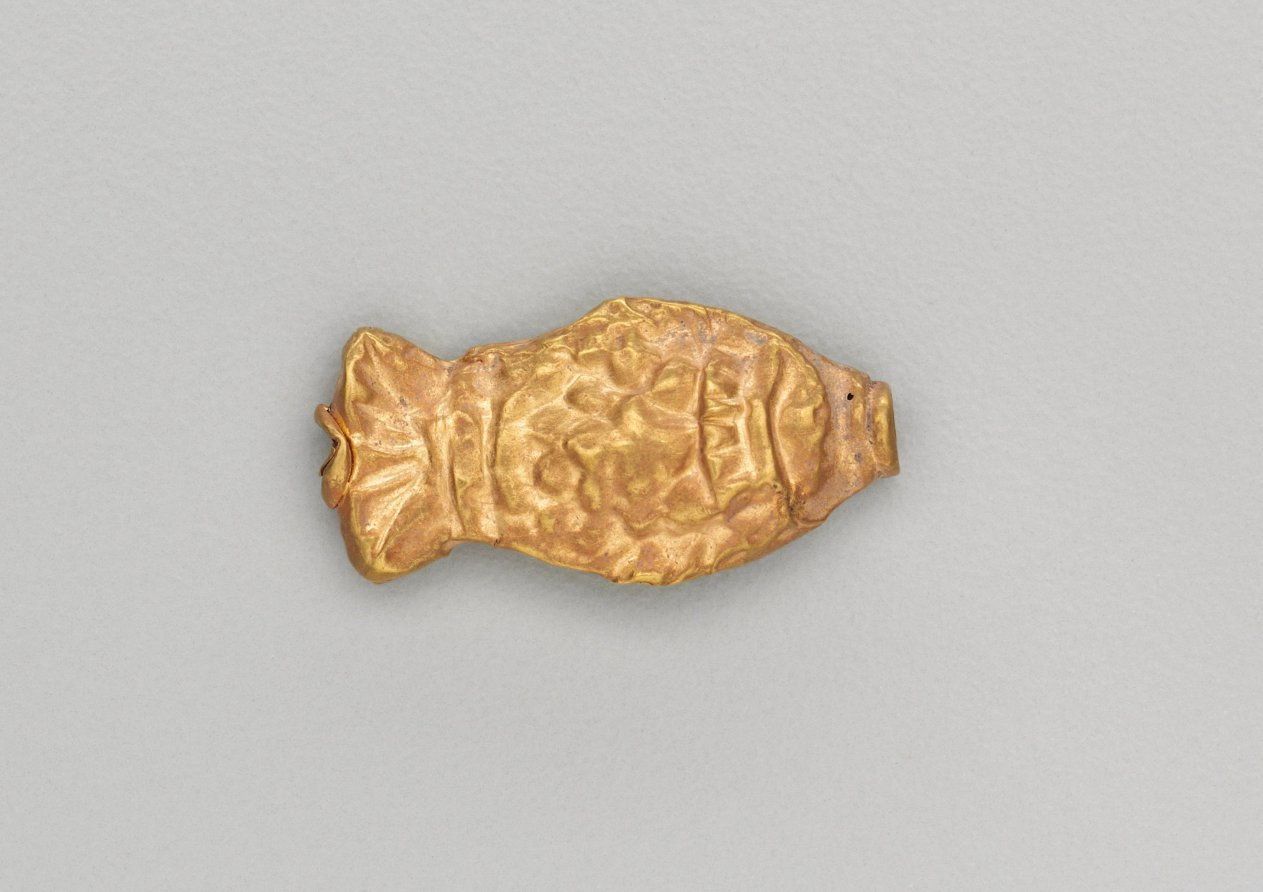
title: Necklace Bead in the Form of a Fish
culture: India, Shunga period (185–78 BCE)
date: 185–72 BCE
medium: gold repoussé with granulation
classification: Jewelry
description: Jewelry in ancient India often consisted of elements associated with water, such as fish and other aquatic plants and animals. Since water is essential for life, imagery that connotes water is life-affirming, or auspicious, and therefore appropriate adornment.